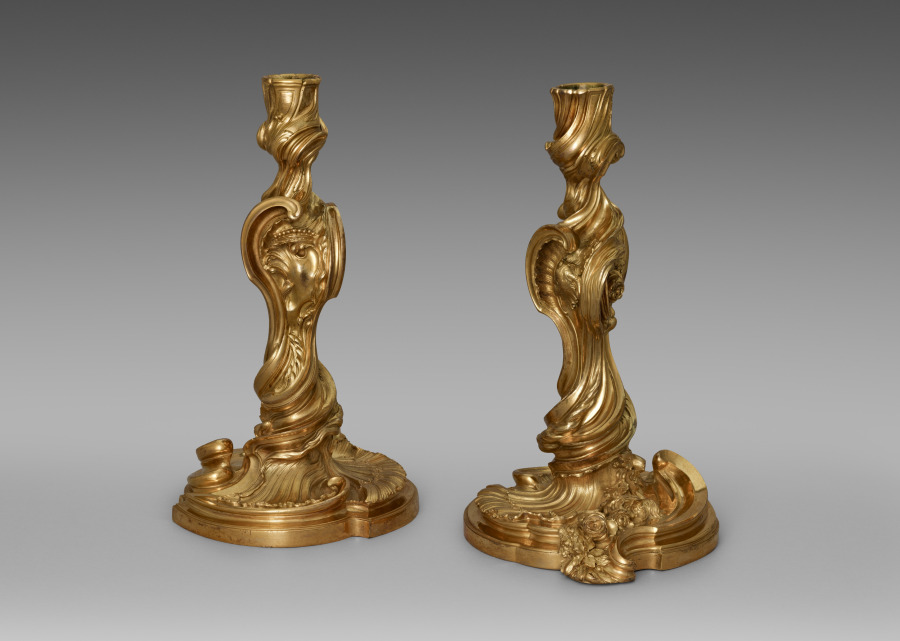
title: Candlesticks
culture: France, 18th century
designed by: Juste-Aurèle Meissonnier (French, 1695–1750)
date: c. 1740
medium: gilt metal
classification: Furniture and woodwork